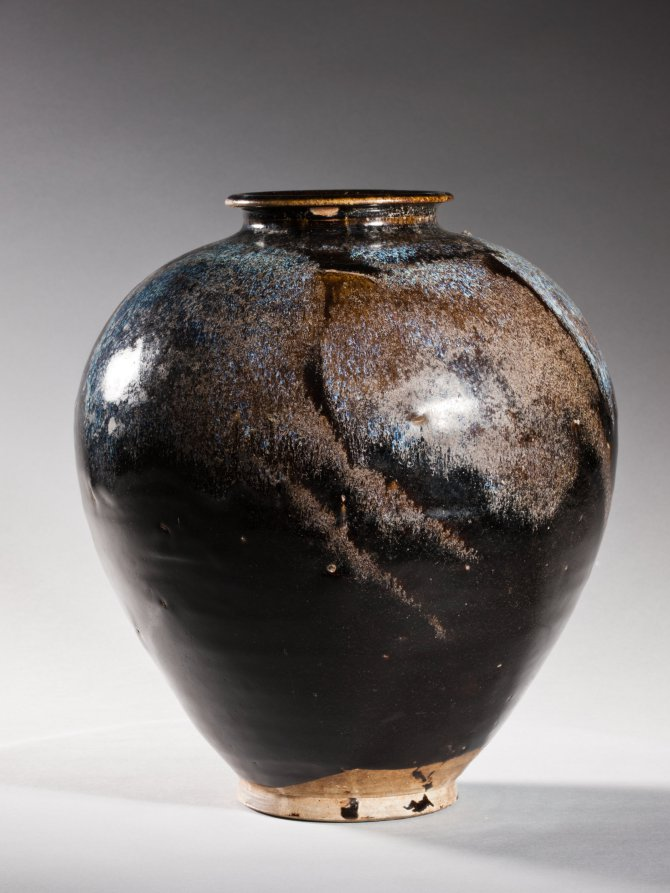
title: Jar: Black Ware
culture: China, Henan province, Huangdao kilns, Tang dynasty (618-907)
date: 700s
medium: glazed stoneware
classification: Ceramic